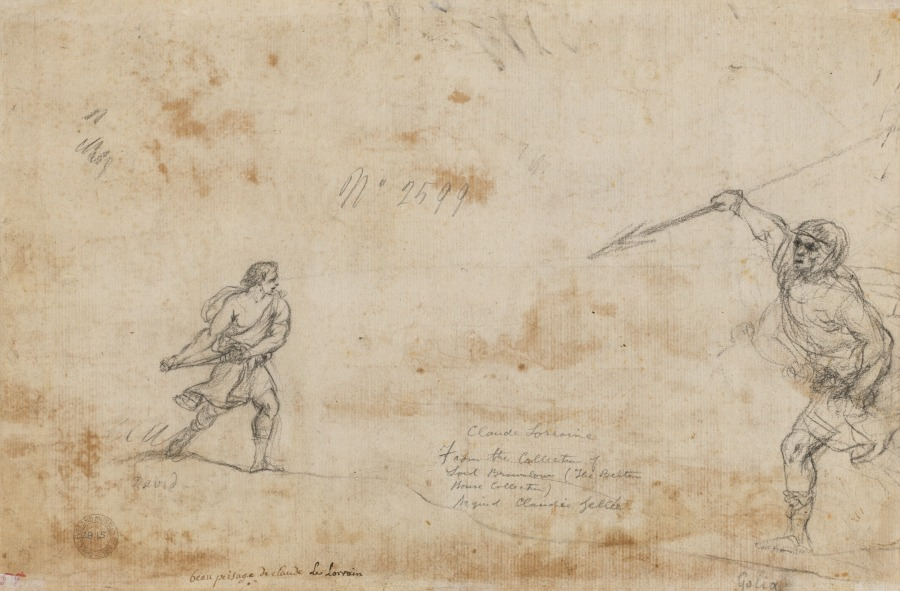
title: David and Goliath (verso)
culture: France, 17th century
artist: Claude Lorrain (French, 1604–1682)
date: c. 1645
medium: black chalk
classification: Drawing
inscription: verso, lower left, in brown ink: beau peisage de claude Le Lorrain; lower left, in graphite: David; lower right, in graphite: Golia; upper center, in graphite: No 2599; lower center, in graphite: Claude Lorraine / From the Collection of / Lord Brownlow (The Belton / House Collection) / Signed Claudio Gellée.; lower left, in red watercolor: 55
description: This drawing represents a view of the famous Acqua Acetosa, a mineral spring that until the 19th century provided the favored drinking water of Romans who believed in its healing powers. Although topographically accurate, the sheet is not a plein-air study but a vision of an imagined Arcadian world carefully rendered by Gellée, one of the most original painters of the 17th century. The French-born artist spent his career painting and drawing the Roman Campagna and the Neopolitan coastline. Sublimely beautiful pen-and-ink and wash drawings such as the example here reveal the artist's highly poetic response to the natural world and his unparalleled sensitivity to light.